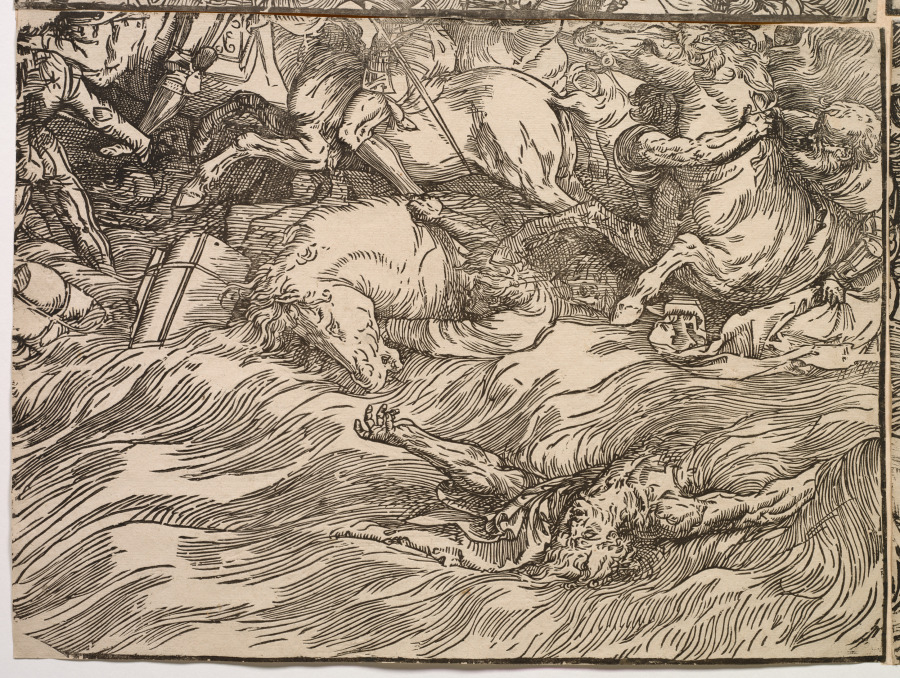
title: The Submersion of Pharaoh's Army in the Red Sea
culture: Italy, Venice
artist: Titian (Italian, c. 1488–1576)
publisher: Domenico dalle Greche (Italian, 1503–1603)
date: 1514–15, printed 1549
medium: woodcut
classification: Print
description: To make this monumental woodcut—considered one of the most ambitious prints of the Renaissance—Titian probably drew directly on the wooden blocks, after which a skilled cutter completed the blocks. The size rivals that of a painting, and the composition would have hung on a wall. Titian’s bold vision presents nature as a vehicle of God’s mercy and wrath. Moses, at right, having parted the seas for the Israelites to pass, commands them to close over the Egyptian forces (Exodus 14:21–31). Titian propelled the narrative with remarkable unity, dedicating entire blocks to the turbulent sea and rolling clouds that culminate in a magnificent cliff and Renaissance city. Some have interpreted the scene as an allegory of Venice’s troubles with the League of Cambrai, a military alliance that threatened the island city.